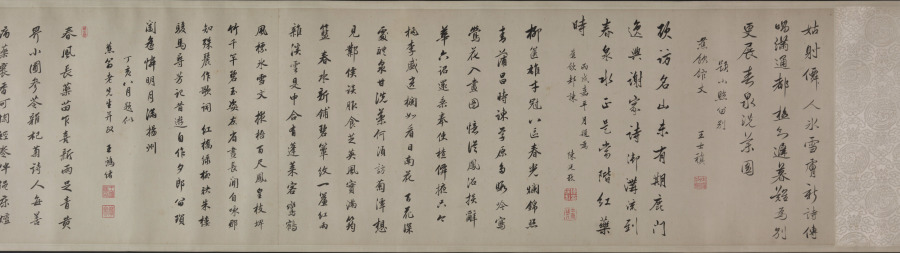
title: Cleansing Medicinal Herbs in the Stream on a Spring Day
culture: China, Qing dynasty (1644-1911)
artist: Yu Zhiding (Chinese, 1647–c. 1716)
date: 1703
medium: Handscroll; ink and color on silk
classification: Painting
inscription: Title by Chen Yixi.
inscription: 姑射仙人冰雪膚，新詩傳唱滿通都。/ 極知遲暮難為別，更展春泉洗藥圖。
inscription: Colophon by Chen Tingjing 陳廷敬 (1639–1712). Colophon by Wang Hongxu 王鴻緒 (1645–1723), dated 1707. Colophon by Song Luo 宋犖 (1634–1714). Colophon by Liu Yan 劉巗. Colophon by Jing Xikui 涇西夔. Colophon by Liu Yan 劉巗. Colophon by Cao Yin 曹寅. Colophon by Wang Shihong 汪士鋐. Colophon by Wang Shidan 王式丹 (1645–1718), dated 1712. Colophon by Shi Shenyi 史申義 (1661–1712), dated 1712. Colophon by Yin Yuqing 殷餘慶, dated 1712.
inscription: Colophon by Chen Shixia 陳時夏, dated 1729.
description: A famous portraitist, Yu Zhiding here depicts the likeness of Shi Shenyi 史申義 (1661–1712), an official and poet. Master Shi, a sickly man, was deeply interested in medicinal science. The opening section of the scroll features a boy washing a fungus in fresh spring water, a basket of medicinal herbs by his side. Other servants carry a fan, a bundle of scrolls, and a cup of tea or hot wine. Master Shi sits in a bamboo grove, surrounded by fields of herbs. Returning swallows, pink peach blossoms, and blooming magnolia indicate spring, whereas the fungus conveys wishes for long life. The spring theme may express the artist’s wish for his friend’s recovery.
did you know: In the pavilion are some of Shi Shenyi’s scholarly accoutrements: a stack of books, an antique zun 尊 (wine vessel), a brush holder, an ink stone, and a small chime.